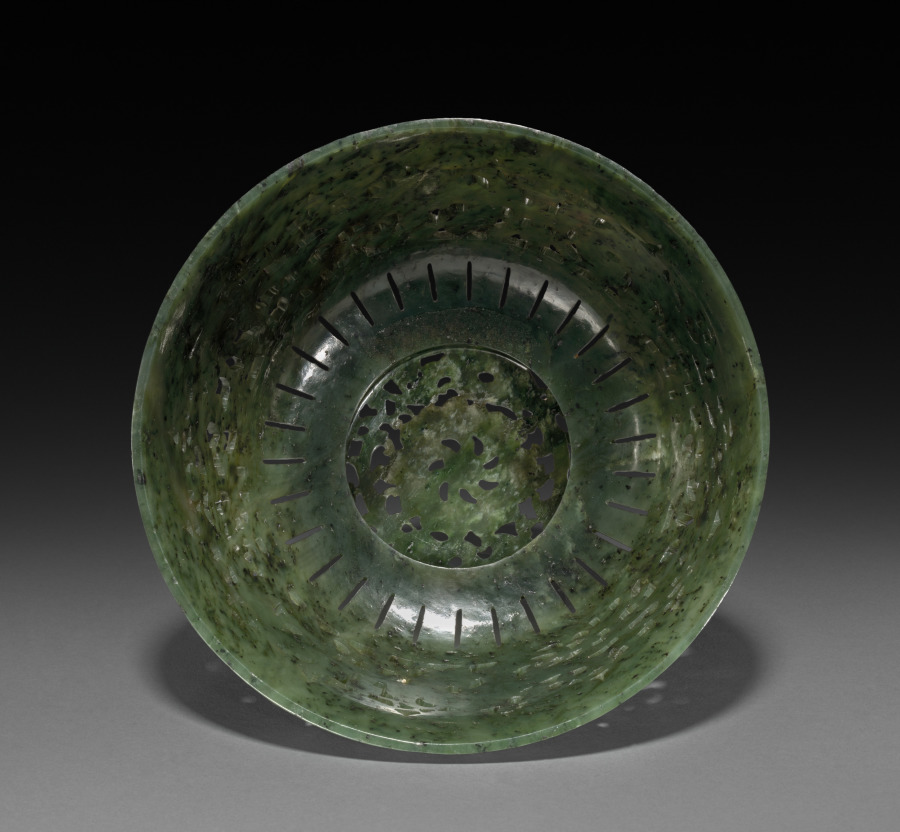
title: Koro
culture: China, Qing dynasty (1644–1911), Qianlong reign (1736–95)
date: 1736–95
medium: jade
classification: Jade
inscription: Qianglong mark on base